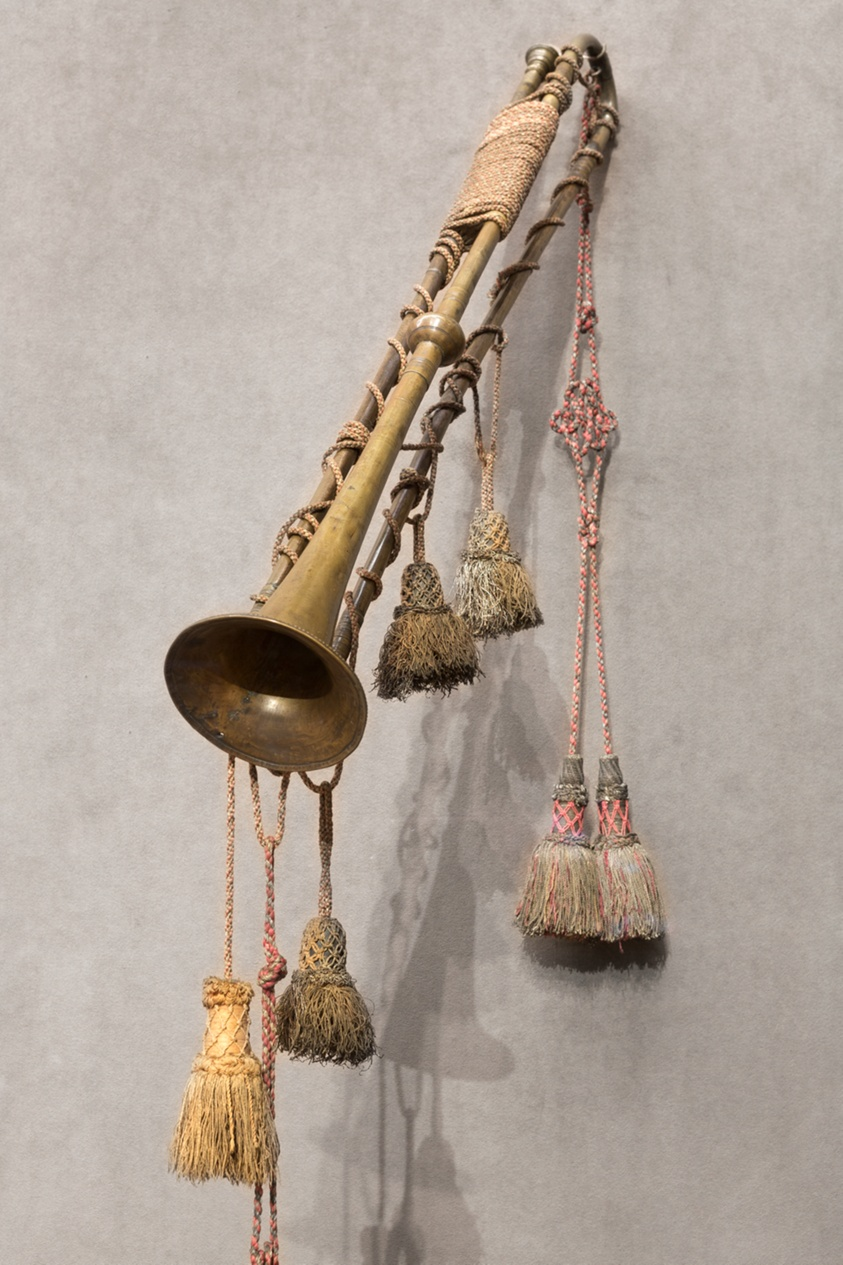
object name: Armor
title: Natural Trumpet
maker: Wilhelm Haas (German, 1648—1723); Nuremberg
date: 1680/1720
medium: Brass, silk and silver gilt cording, and wood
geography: Nuremberg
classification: arms and armor, miscellaneous; arms and armor; armor